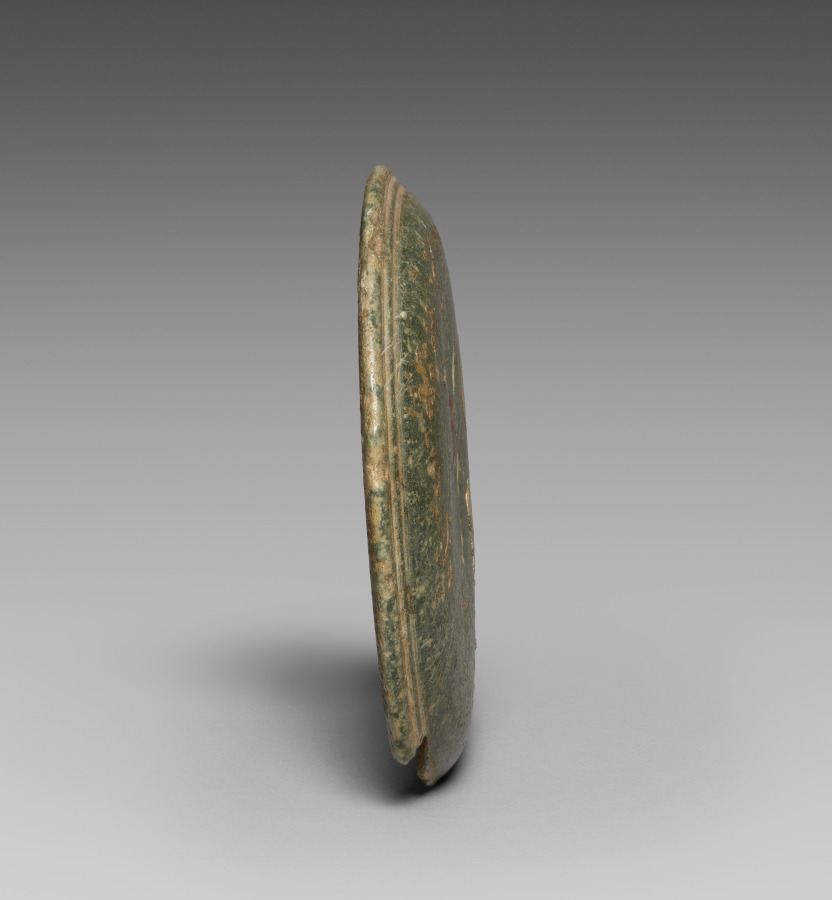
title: Patera with Man Riding Monster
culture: India, Gandhara, Taxila, Palera period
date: 1–200 CE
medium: gray schist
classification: Sculpture